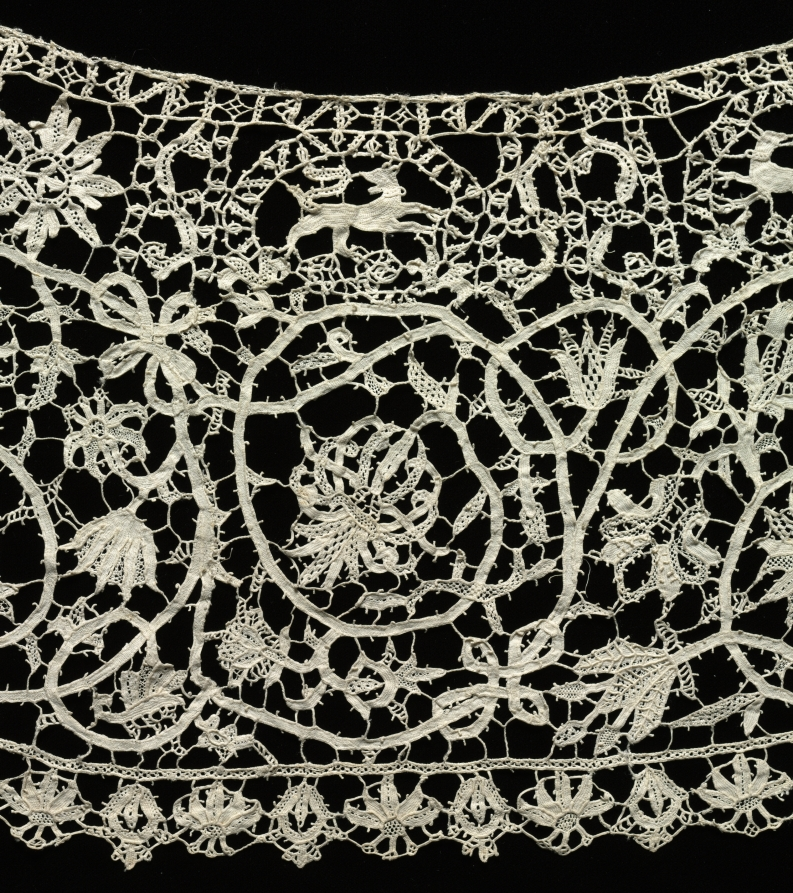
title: Lace Collar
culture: Italy, Venice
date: 1500s–1600s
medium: Needle lace (Punto in aria)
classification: Lace